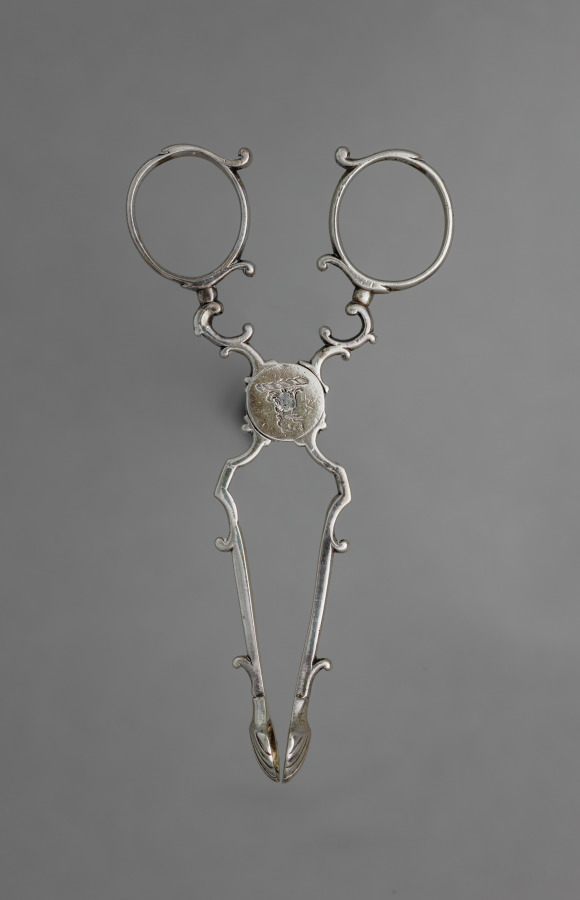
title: Sugar Scissors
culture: England, 18th century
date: c. 1750–1760 and late 19th century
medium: silver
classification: Silver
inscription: engraved Griffin crest on pivot.